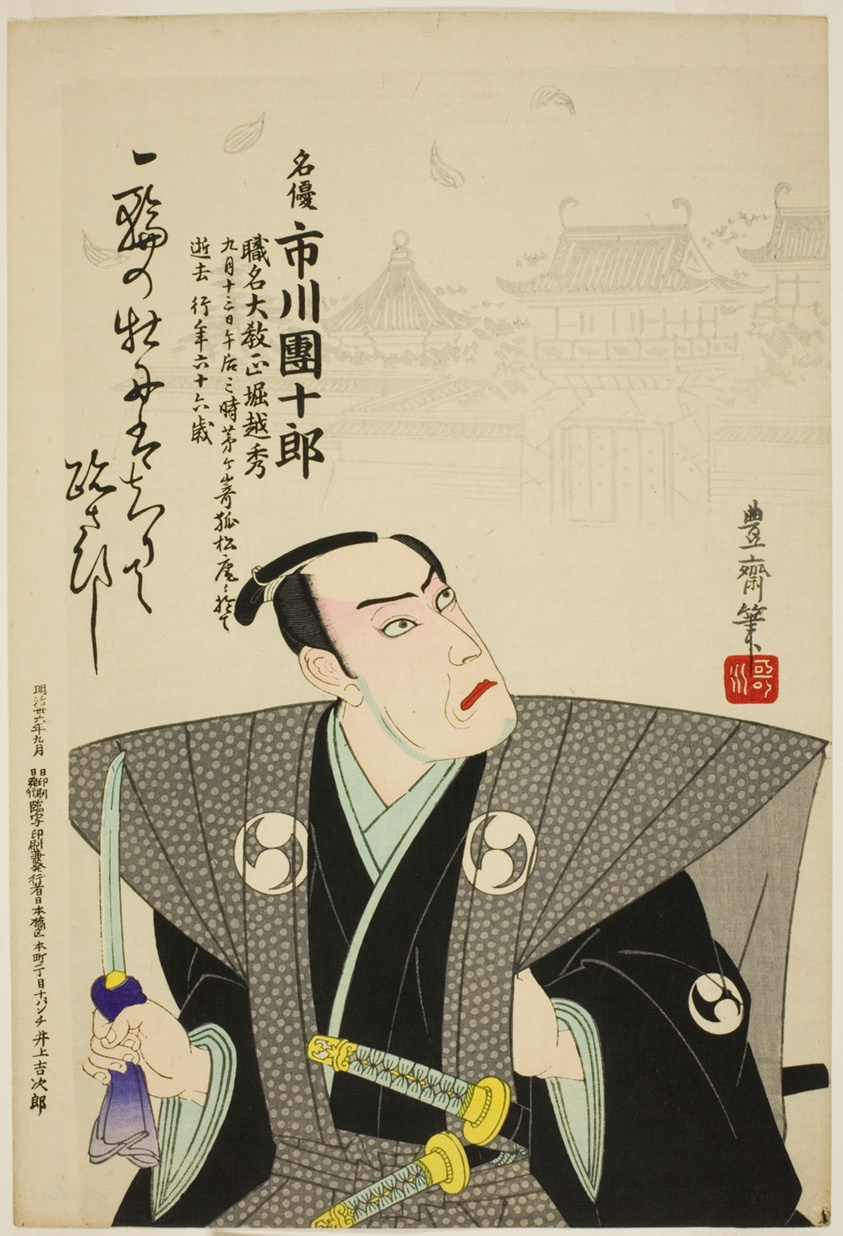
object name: Print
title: Memorial Portrait of the Actor Ichikawa Danjuro IX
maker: Utagawa Kunisada III (Kunimasa IV, Toyokuni V) (Japanese, 1848–1920)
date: 1903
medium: Color woodblock print; oban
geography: Japan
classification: print; asian art